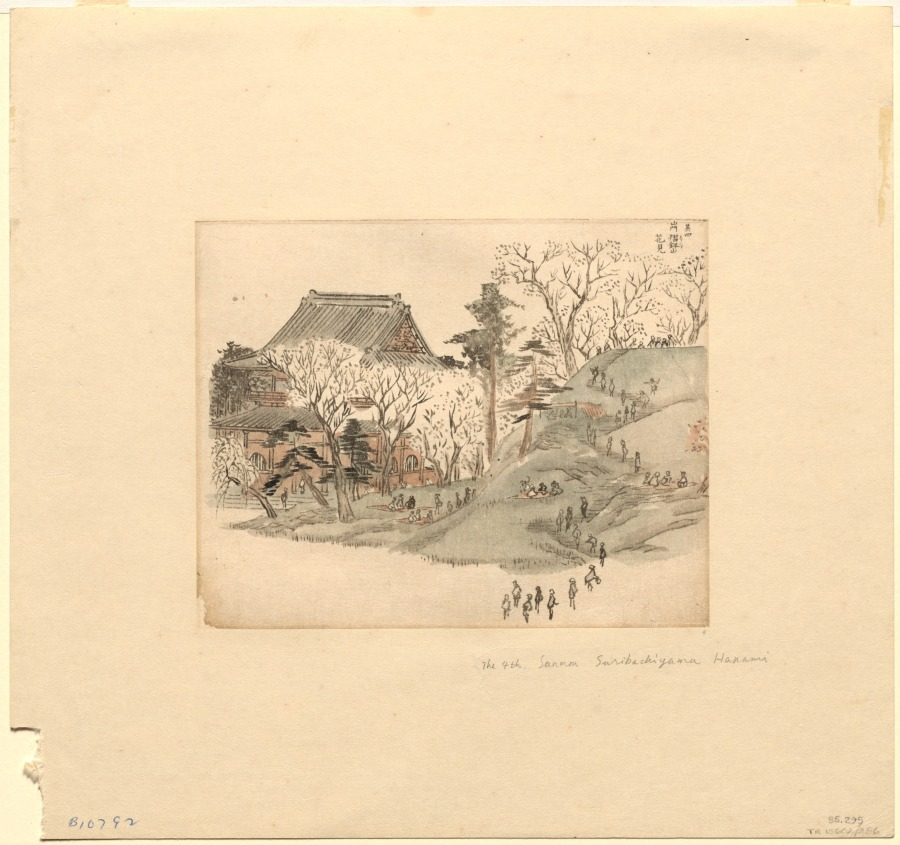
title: Cherry Blossom Viewing at the Temple on Mt. Suribachi after a Design in Volume 5 of Picture Book of the Souvenirs of Edo (Ehon Edo miyage)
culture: Japan, Edo period (1615–1868)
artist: after Utagawa Hiroshige (Japanese, 1797–1858)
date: after 1850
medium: watercolor on paper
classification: Drawing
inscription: Titled in upper right.